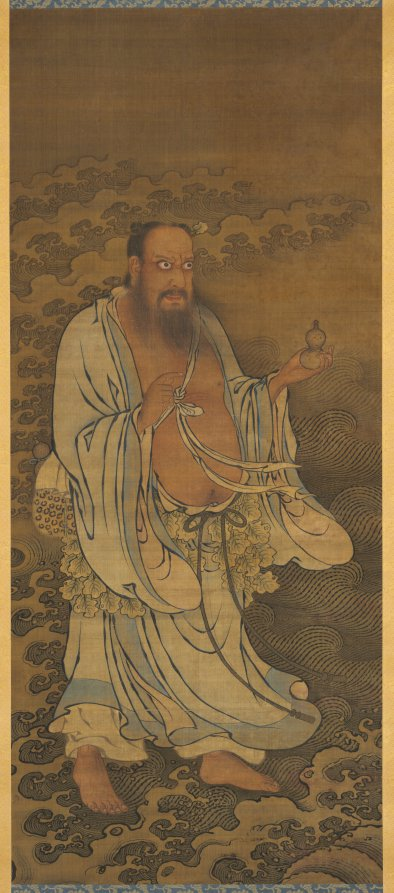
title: Zhongli Quan Crossing the Ocean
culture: China, Ming dynasty (1368–1644)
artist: Zhao Qi (Chinese, active early 1500s)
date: 1368–1644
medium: Hanging scroll; ink and color on silk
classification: Painting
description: Here, Zhongli Quan is crossing the ocean. He is one of the Eight Immortals (baxian), a group of popular Daoist figures who understood the way of life and could transform into otherworldly beings. Zhongli Quan is usually depicted as a scholar with a big belly seen through his partially open robe. The artist used expressive brushwork to depict the immortal’s fluttering robe and the roaring waves, skillfully creating a sense of movement. This scroll may have been one of a set depicting the Eight Immortals. Although the painting has no signature or seal, its style supports an attribution to the Ming dynasty painter Zhao Qi.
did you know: Zhongli Quan wears a girdle of leaves, a common Daoist immortal-recluse attribute.